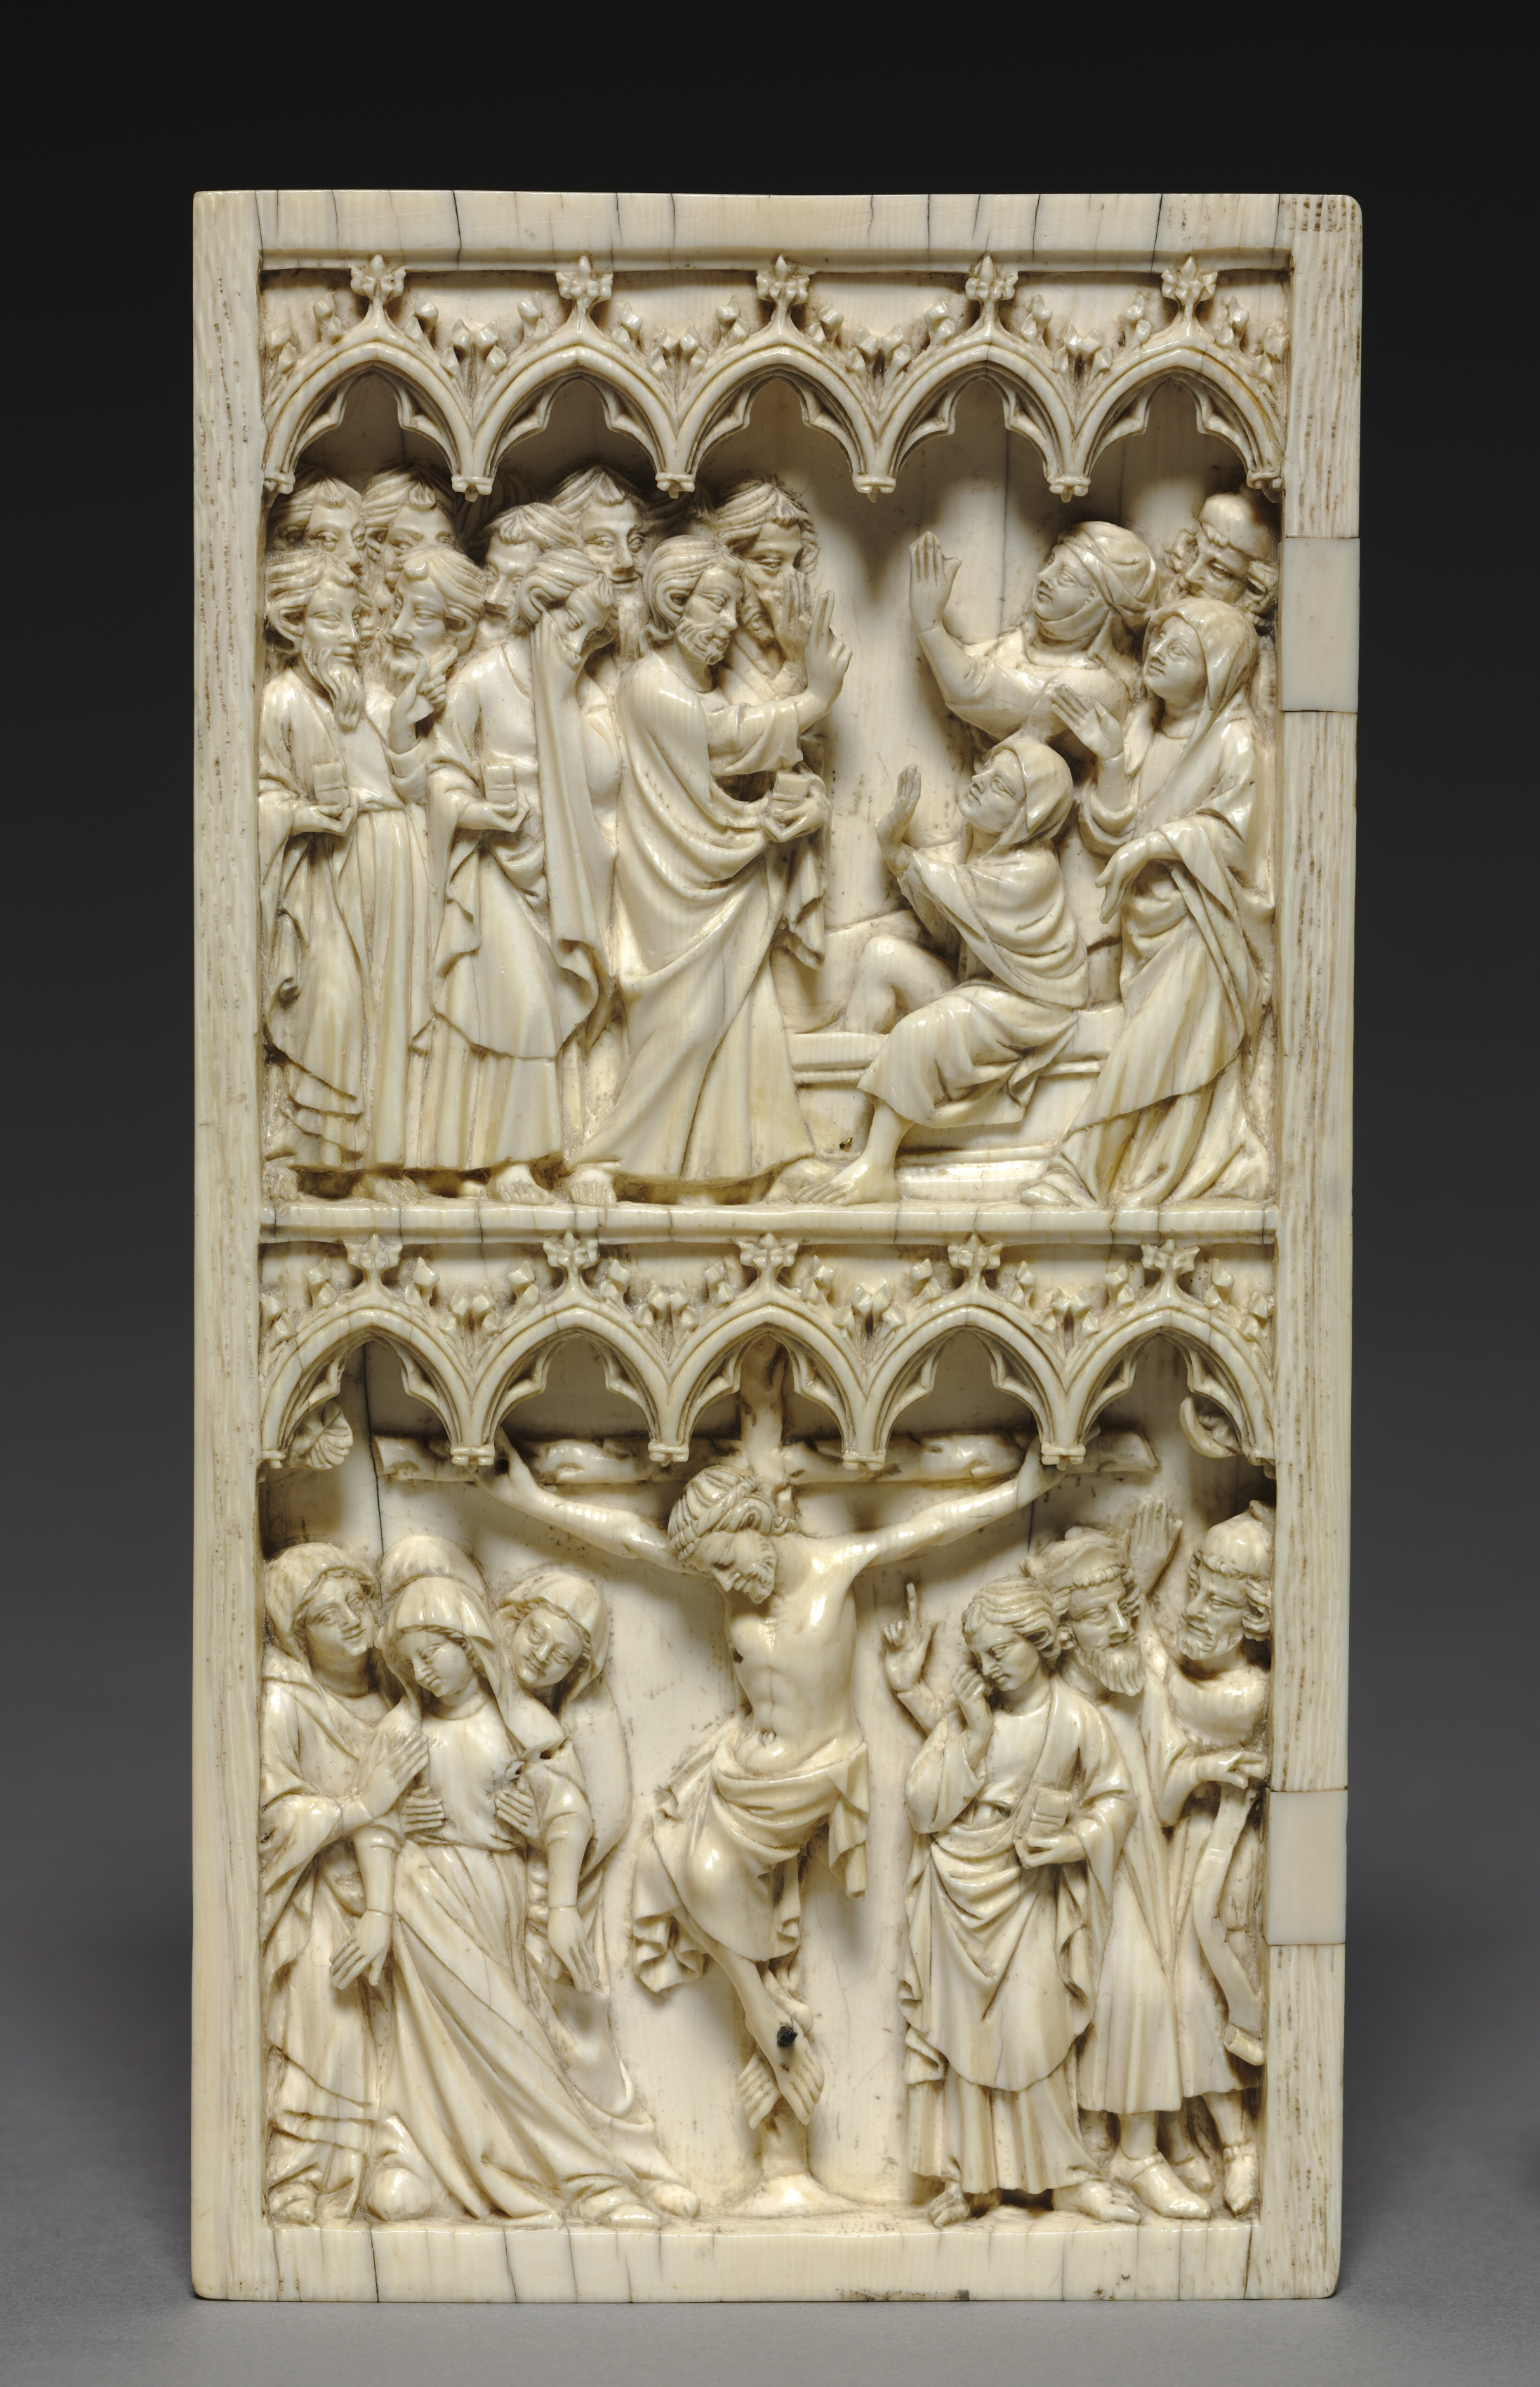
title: Diptych with Scenes from the Life of Christ (right wing: Entry into Jerusalem and Entombment)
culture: Germany, Thuringia or Saxony, 14th century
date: c. 1350–1375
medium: ivory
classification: Ivory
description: Ivory diptychs (two panels hinged together) were used for private devotion by their aristocratic owners. The scenes represented here are Christ’s Entry into Jerusalem, the Raising of Lazarus, the Crucifixion, and Christ’s Entombment. They suggest choices made by the original owner who wished to contemplate these aspects of Christ’s passion.